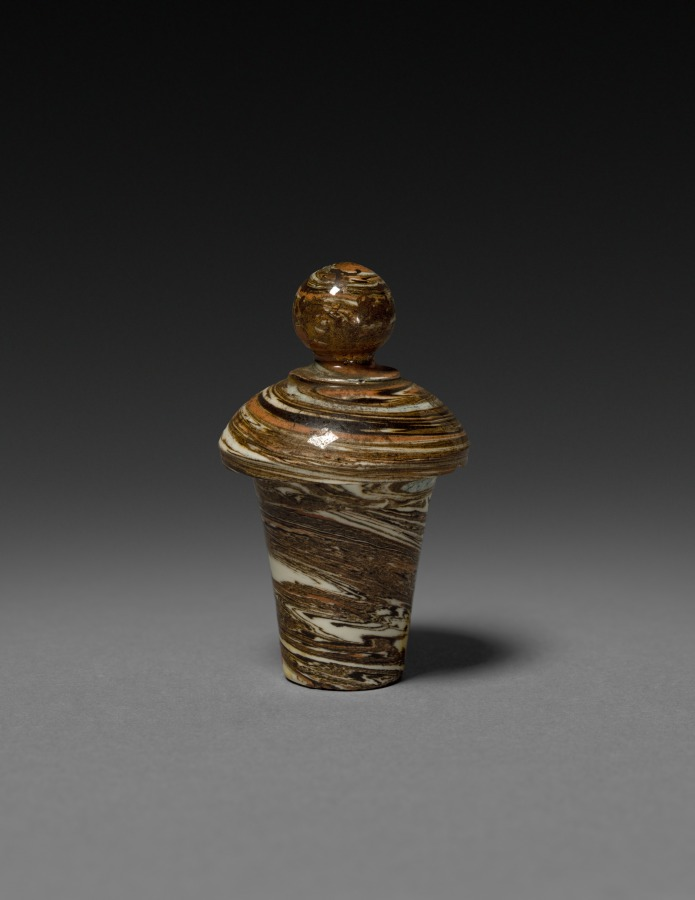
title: Urn (lid)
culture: England, late 18th or 19th century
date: late 1700s - 1800s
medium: earthenware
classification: Ceramic